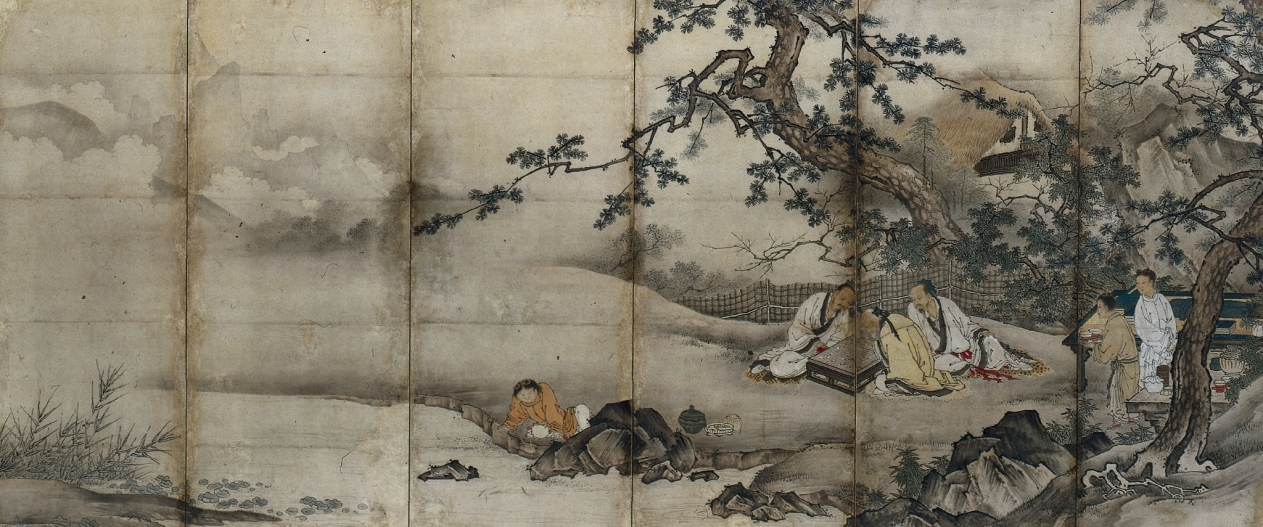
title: The Four Accomplishments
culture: Japan, Momoyama period (1573–1615)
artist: attributed to Kano Shōei (Japanese, 1519–1592)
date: late 1500s–early 1600s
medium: One of a pair of six-panel folding screens; ink and slight color on paper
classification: Painting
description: This is one of a pair of screens that shows a group of elite Chinese gentlemen and their servants in the countryside. One man looks on as two of his companions play a board game. Nearby is a table set with a selection of books and a qin, a type of stringed instrument, still wrapped in its cloth case, waiting to be played. The mood is one of enjoyment balanced with formality. Historically, playing the qin or qi (a game similar to chess called go in Japan), and practicing or admiring calligraphy were considered three skills essential for cultured men in China.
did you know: One of the servants is diverted by the motion of a fish in the water.